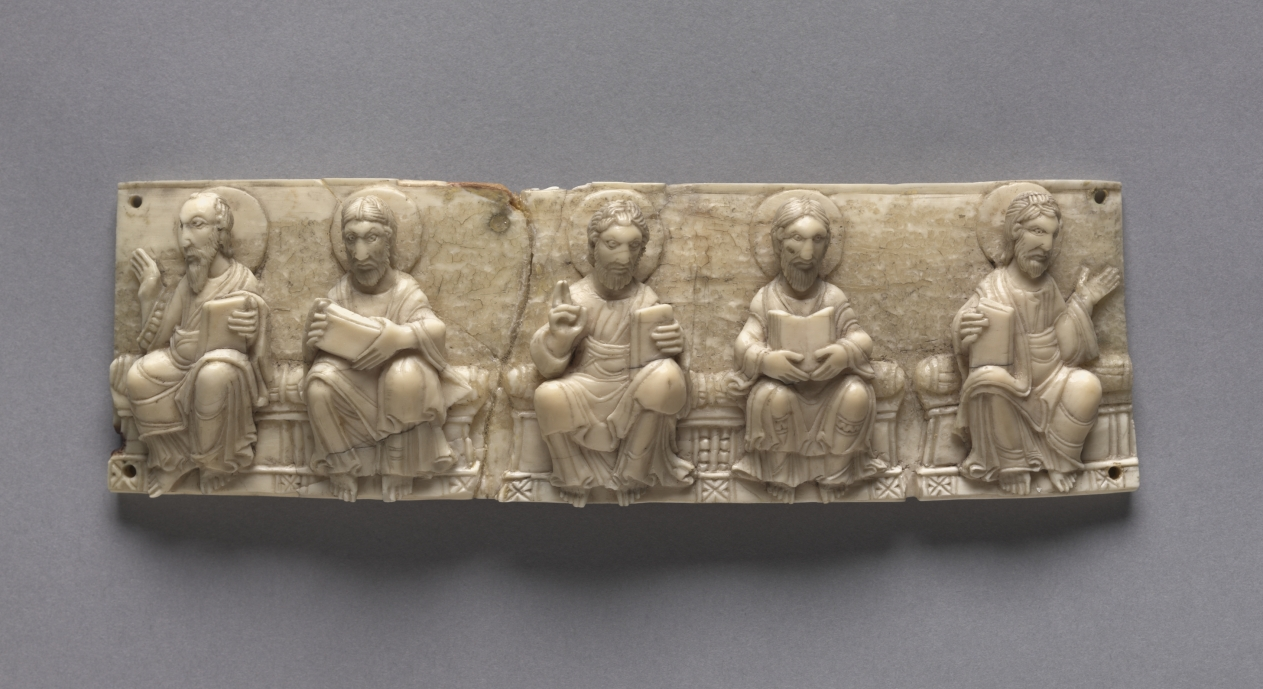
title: Plaque from a Portable Altar: Christ and the Apostles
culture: Germany, Lower Rhine Valley, Romanesque period, 11th century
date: 1050–1100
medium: walrus ivory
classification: Ivory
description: This intricately carved ivory panel once decorated the side of a portable altar. One of three it depicts Christ in Majesty and his apostles, and was the first major acquisition of William M. Milliken, the museum's first curator of decorative arts and later director (1930–1958). As Milliken later recalled, the pieces "were immensely intriguing, monumental in scale, even if tiny in size, the Christ in the mandorla could have been enlarged and would have graced the tympanum of a great cathedral."